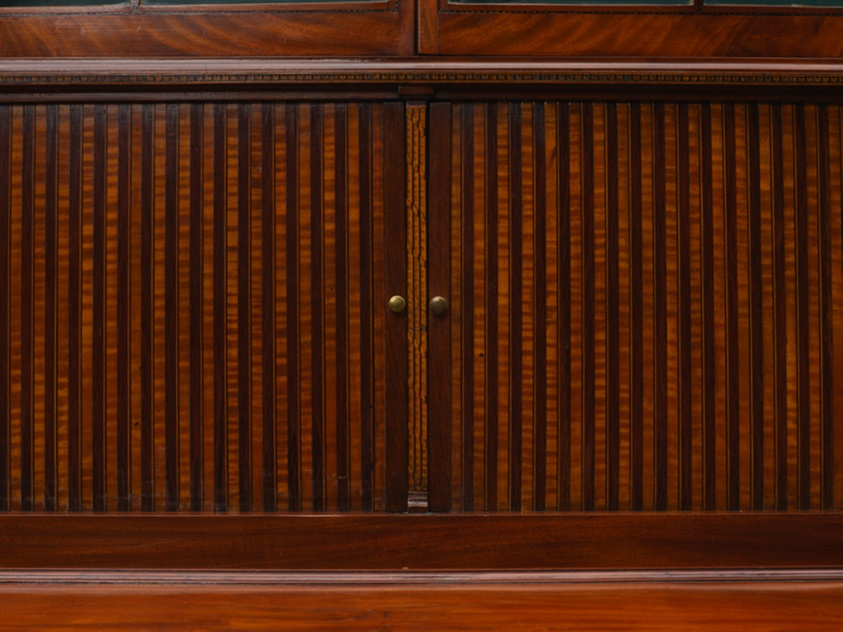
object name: Furniture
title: Tambour Desk and Bookcase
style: federal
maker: Attributed to the workshop of John and Thomas Seymour (American, active 1793–1804); Or attributed to the workshop of Thomas Seymour (American, active 1804–1817); Boston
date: c. 1800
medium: Mahogany, satinwood, white pine, cherrywood, chestnut, with brass, ivorine, and leather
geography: Boston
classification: furniture; american arts; american decorative arts; bookcase; decorative arts; desk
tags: furniture, cabinets, shelves, drawer, locks, keys, bookcase, decorative arts, desk, escutcheons